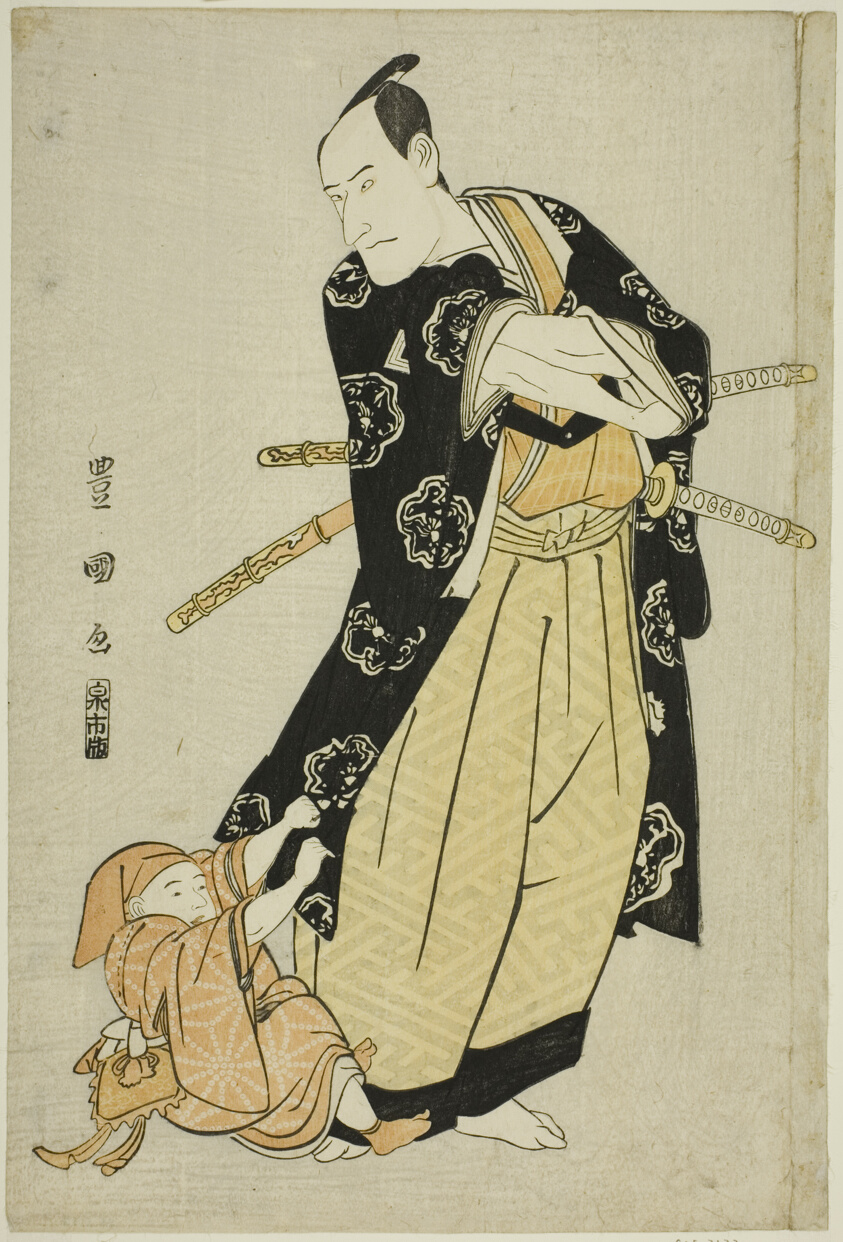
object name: Print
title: The actor Ichikawa Danjuro VI and a boy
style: Japanese (culture or style)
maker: Utagawa Toyokuni I 初代 歌川 豊国; Japanese, 1769–1825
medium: Color woodblock print; oban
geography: Japan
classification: woodblock print; print; asian art